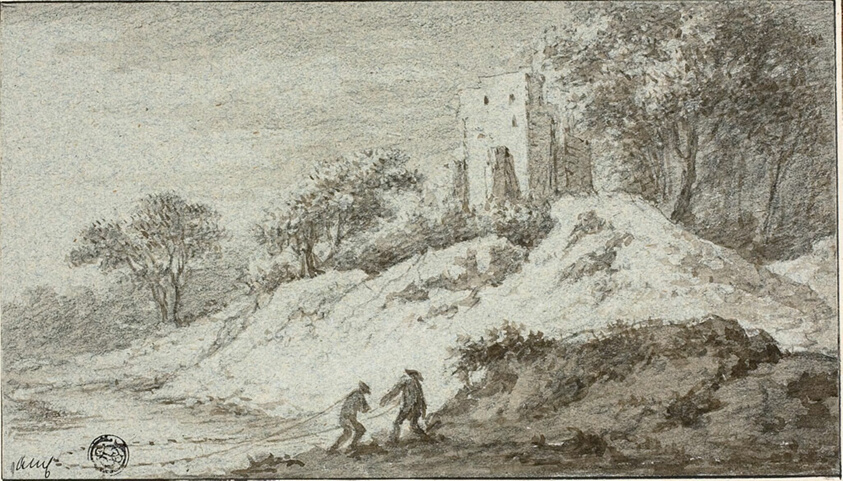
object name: Drawing and Watercolor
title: Landscape with Two Figures and Castle on Hill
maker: Attributed to Allart van Everdingen; Dutch, 1621-1675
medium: Brush and brown wash over black chalk on blue laid paper, laid down on card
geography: Holland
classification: ink or chalk wash; drawings (visual works); prints and drawing